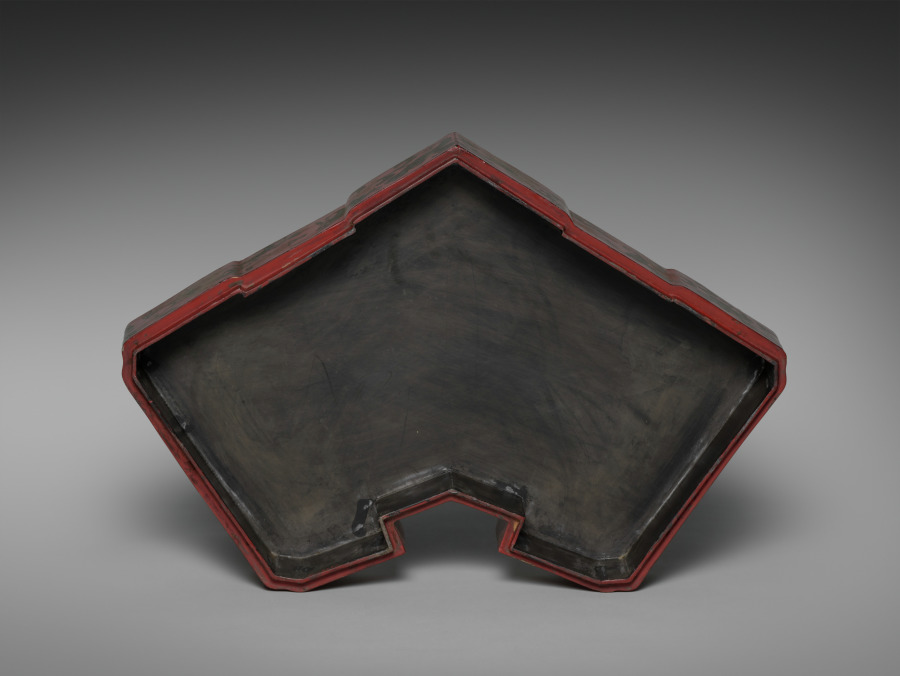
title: Lid for a Tiered Food Box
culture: Japan, Edo period (1615–1868)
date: late 1700s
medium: red lacquer over a wood core, with litharge painting and engraved gold designs (Ryukyuan)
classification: Lacquer